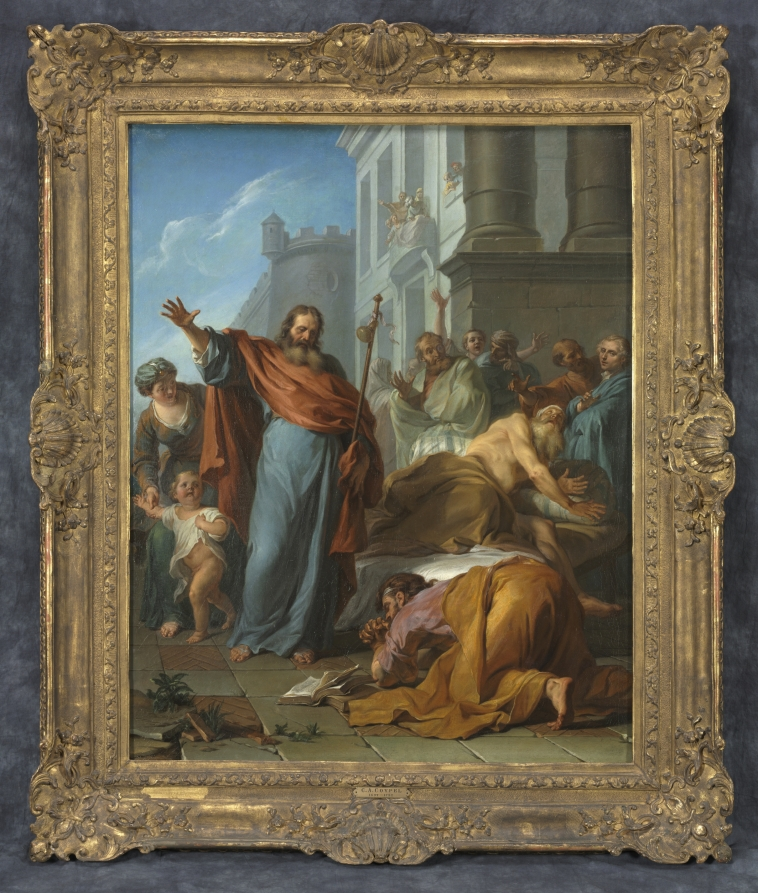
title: The Miracles of Saint James the Greater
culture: France, 18th century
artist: Noël Nicolas Coypel (French, 1690–1734)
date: 1726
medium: oil on canvas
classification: Painting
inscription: Signed lower left: "N. Coypel / 1726"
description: Noël Nicolas Coypel combined two stories associated with Saint James the Greater, one of the twelve apostles of Christ. In the foreground is the magician Hermogenes, begging forgiveness. Hermogenes had cast a spell on James, but the saint turned the curse back on him. When James offered to protect Hermogenes against the demons assaulting him, the magician cast aside his pagan texts in favor of Christianity. According to the second legend, James miraculously cured a paralytic man (in the middle ground at right), thereby averting his own execution and causing the prosecutor to convert. Although this painting is relatively small, the clear composition, grand architectural setting, and dignified and expressive poses of the figures endow it with monumental presence.